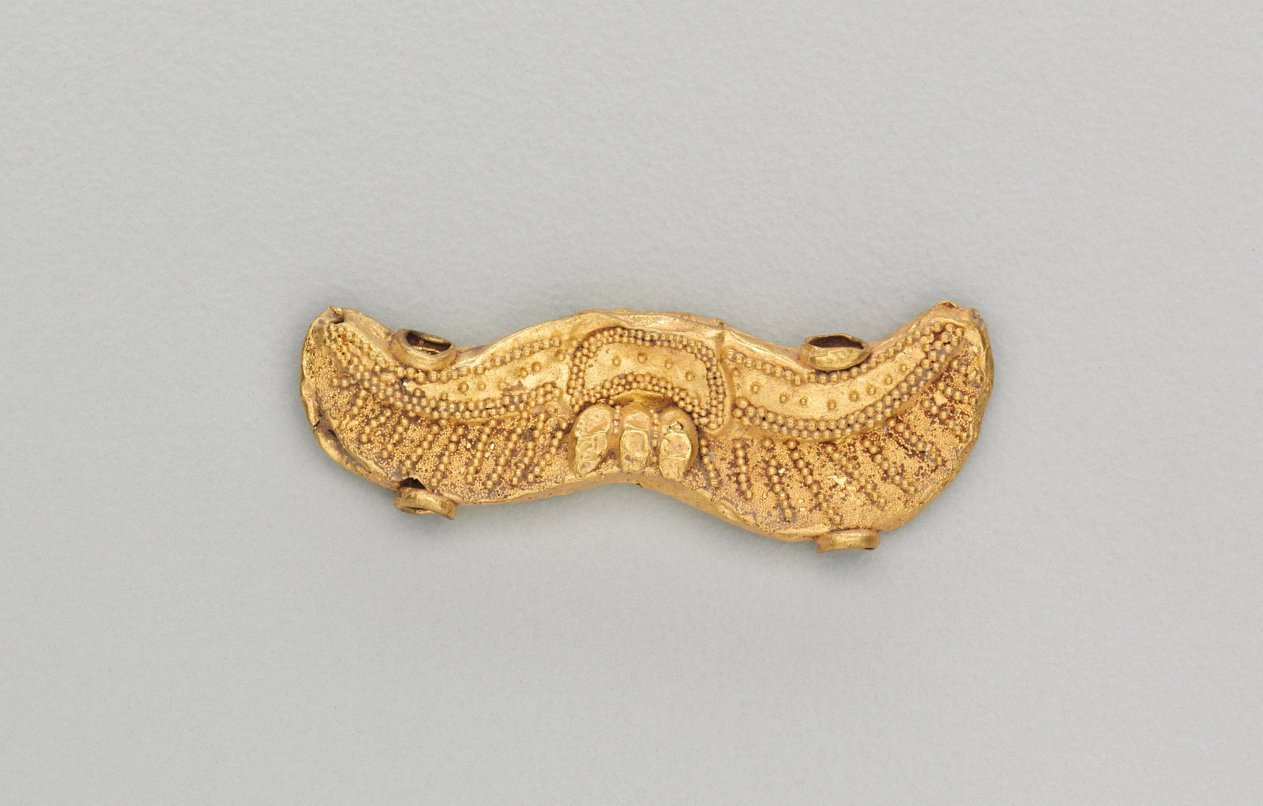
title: Set of Pendants Ending in a Bull's Head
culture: India, Shunga period (185–78 BCE)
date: 185–72 BCE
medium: gold repoussé with granulation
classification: Jewelry